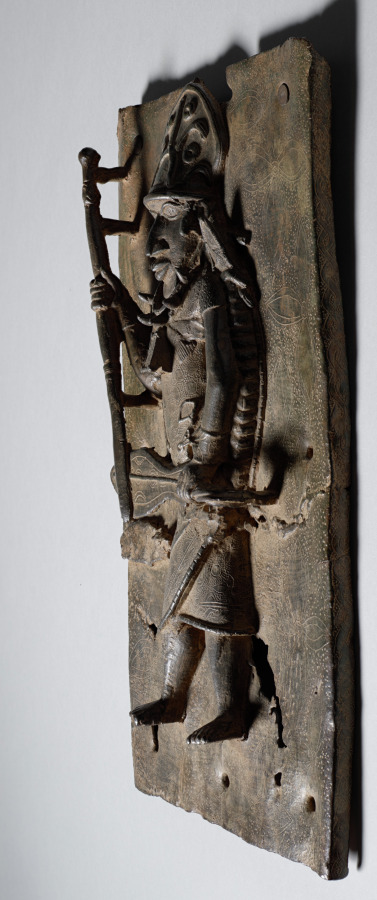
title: Plaque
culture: Nigeria, Benin Kingdom, Ẹdo peoples, members of the Igun Eronmwon (royal brasscasters) guild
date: 1500s–1600s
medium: Copper alloy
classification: Sculpture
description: Craftsmen modeled brass plaques like this in wax before casting them with hot metal. Molds pushed out figures’ general shapes, then details—such as this warrior’s staff and court sword (ẹbẹn)—were added by hand. Reflecting Benin’s global connections, the incised flowers may have Islamic or European origins. Called ebe-amẹn (river leaves) they are identified with Olókun, god of the waters. The interlaced side motifs may connect several early plaques also linked by topic and style. The palace plaques were in storage before the 1897 Siege of Benin. Recently, an art historian virtually reconstructed their former display in the palace based on their dimensions and imagery.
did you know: The bent sides of this plaque once helped attach it to wooden beams in a palace.